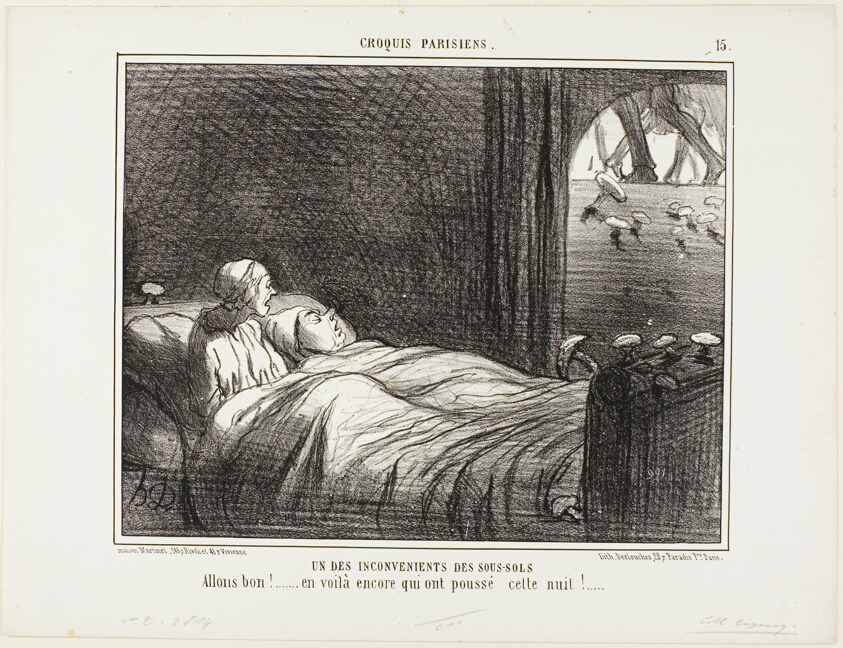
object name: Print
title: One of the Disadvantages of Living in the Basement. “Look, here are some more that grew last night...,” plate 15 from Croquis Parisiens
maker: Honoré Victorin Daumier; French, 1808-1879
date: 1856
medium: Lithograph in black on white wove paper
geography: France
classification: lithograph; print; prints and drawing